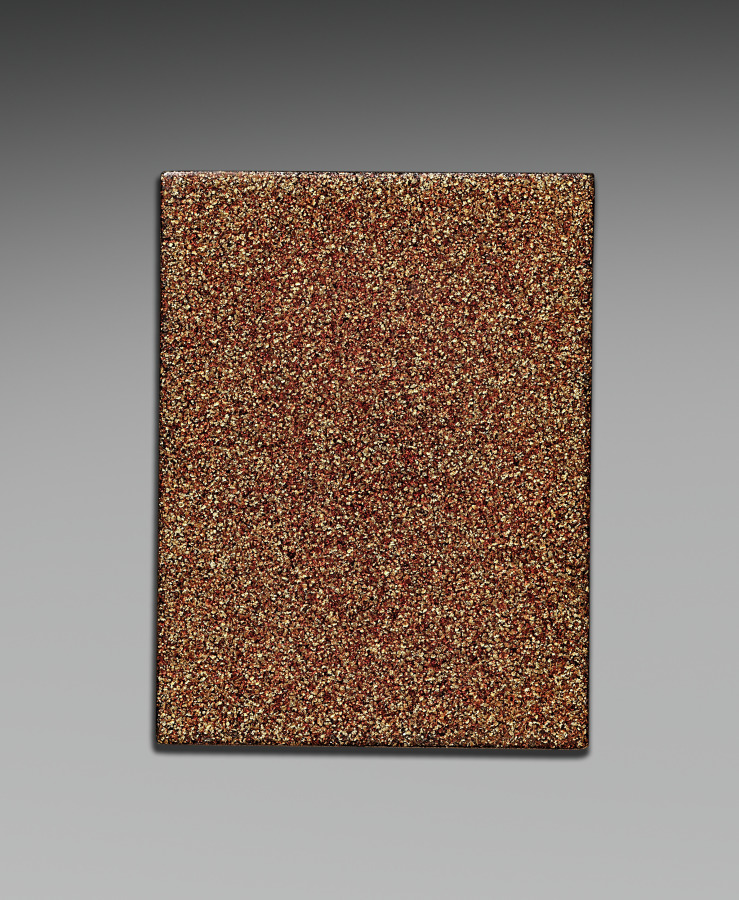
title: Nested Boxes with Chrysanthemums (inner box lid)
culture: Japan, Meiji period (1868–1912)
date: early 1900s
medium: lacquer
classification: Lacquer